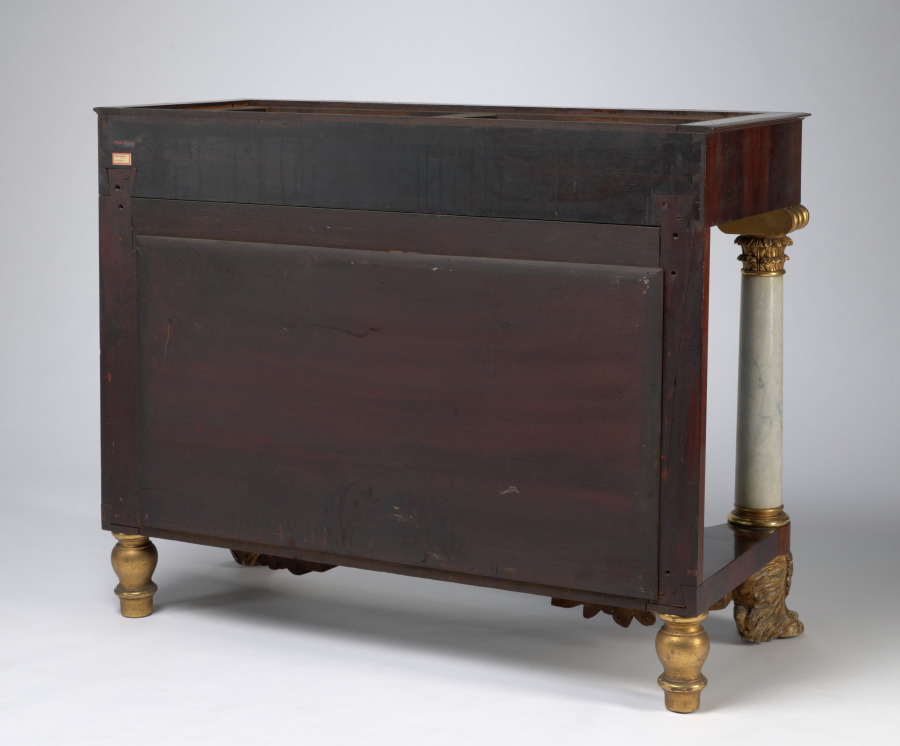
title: Console Table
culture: America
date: 1820–30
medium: mahogany and mahogany veneer with marble top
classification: Furniture and woodwork